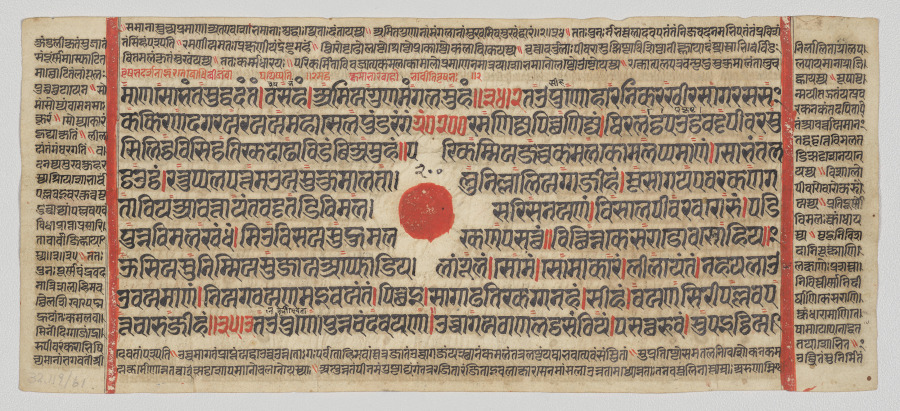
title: Text, Folio 15 (recto), from a Kalpa-sutra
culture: Western India, Gujarat, last quarter of the 15th century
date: c. 1475–1500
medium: Gum tempera, ink, and gold on paper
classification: Painting